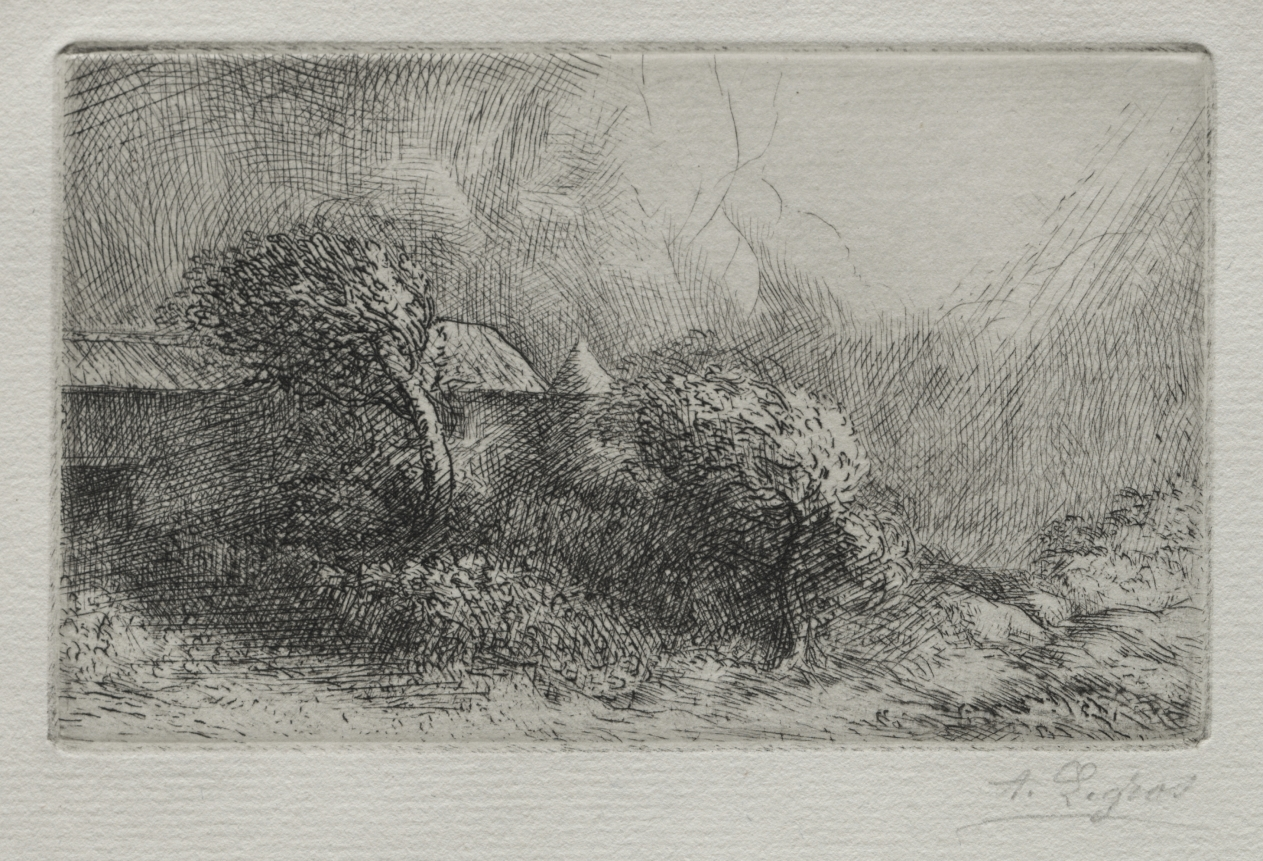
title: Chailli: End of a Storm (Effet d'orage)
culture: France, 19th century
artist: Alphonse Legros (French, 1837–1911)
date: c. 1857–1911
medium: drypoint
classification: Print